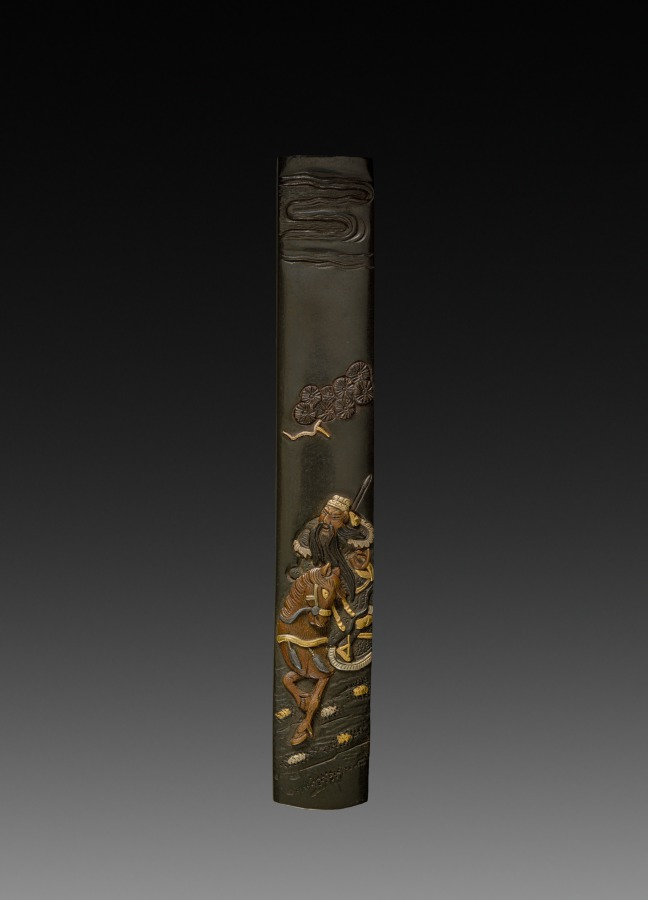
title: Knife Handle (Kozuka)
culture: Japan, Edo period (1615–1868)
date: c 1800s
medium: inlaid bronze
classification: Metalwork